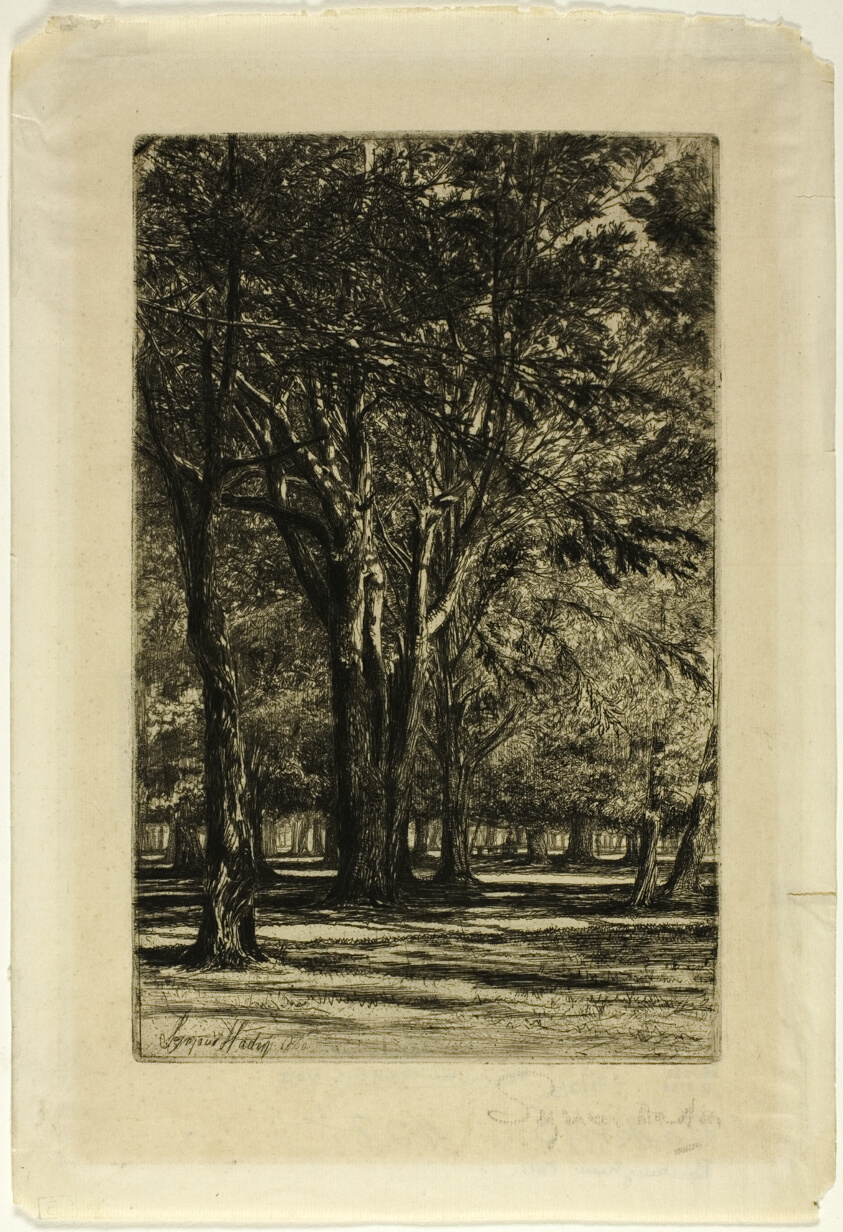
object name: Print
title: Kensington Gardens, No. II (large plate)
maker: Francis Seymour Haden (English, 1818-1910)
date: 1860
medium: Etching with drypoint on cream laid paper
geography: England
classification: etching; print; prints and drawing